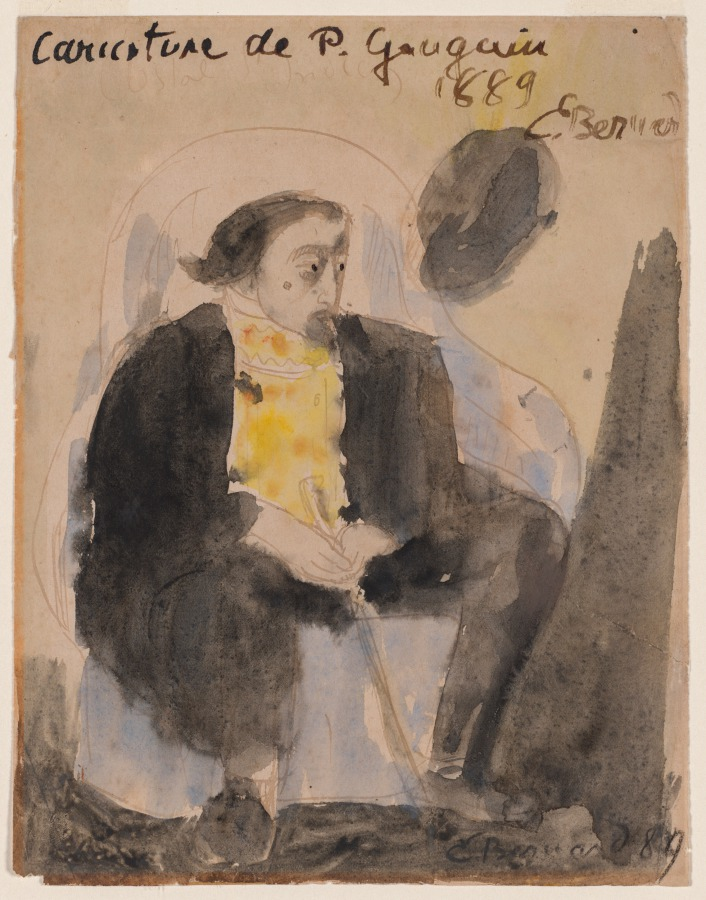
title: Caricature of Paul Gauguin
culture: France, 19th century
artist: Émile Bernard (French, 1868–1941)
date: 1889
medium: watercolor and black ink on paper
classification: Drawing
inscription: upper edge, above image, in pen and brown ink: Caricature de P. Gauguin / in pale brown ink: (Coastal Indian)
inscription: in pen and brown ink: 1889 / E. Bernard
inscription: lower right: E. Bernard 89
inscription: verso: long inscription in pen and brown ink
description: Émile Bernard worked closely with Paul Gauguin in the village of Pont-Aven during the late 1880s, adopting a new style that emphasized imagination rather than observed reality. This caricatural portrait dates to their most intense period of collaboration, and shows Gauguin as the leader of a new school of painting, seated regally and holding a walking stick that resembles a scepter.